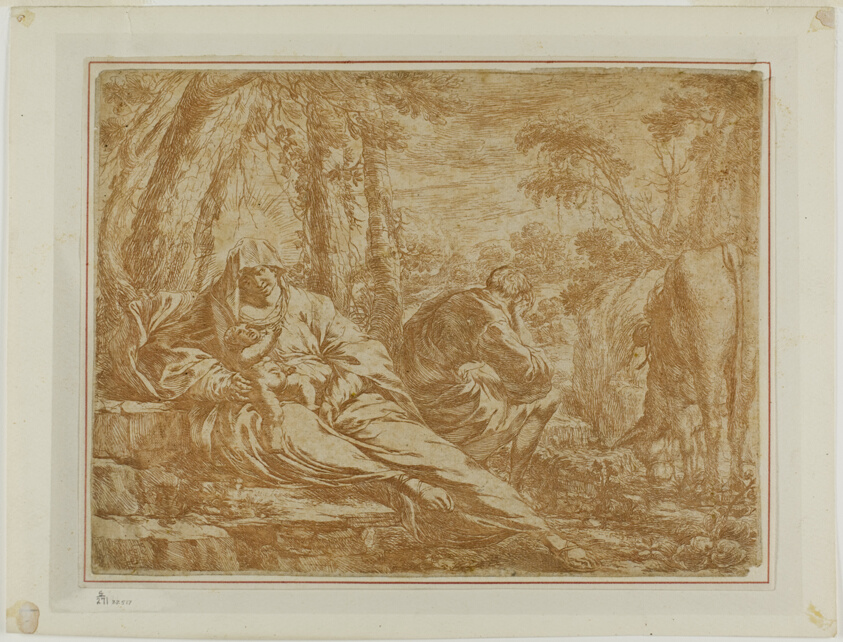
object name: Print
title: Rest on the Flight into Egypt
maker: Bartolomeo Biscaino (Italian, before 1629-1657)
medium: Etching printed in reddish brown on paper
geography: Italy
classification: etching; print; prints and drawing